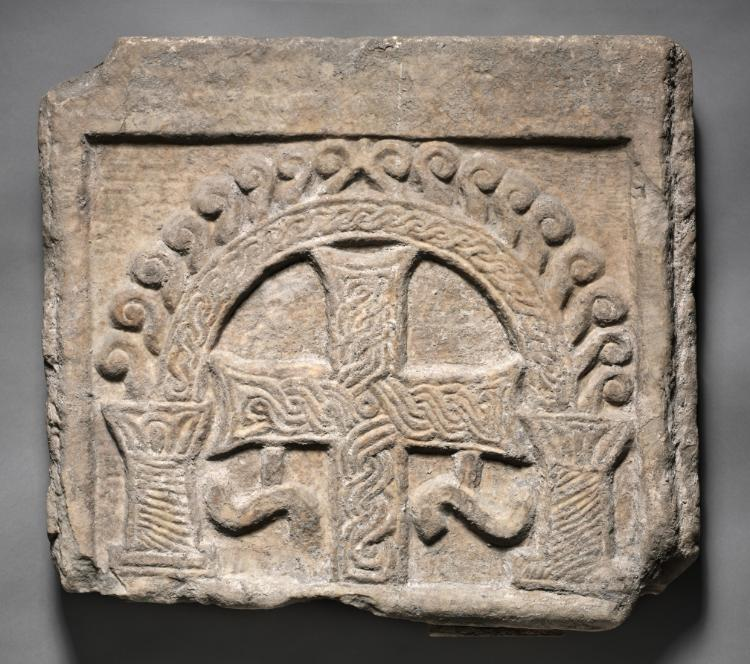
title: Relief Panel from the End of a Sarcophagus: A Cross Within an Arch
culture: Lombardic, Italy, Rome, Migration period, 8th-9th Century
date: 700s-800s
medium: marble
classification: Sculpture